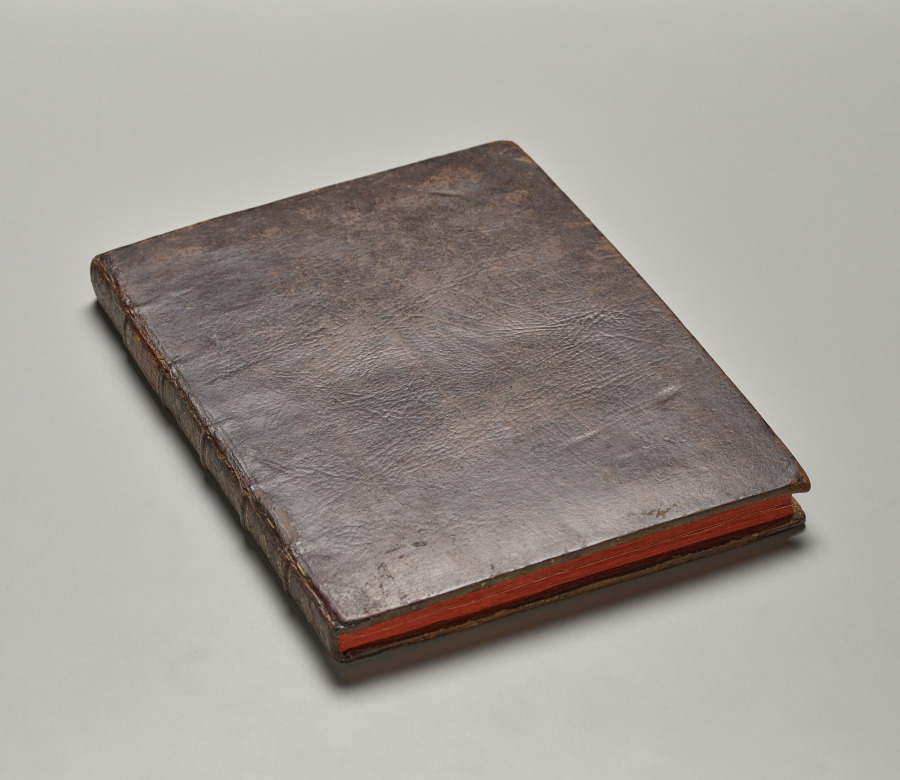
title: The Exercise of Armes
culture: Netherlands, The Hague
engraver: Jacob de Gheyn II (Netherlandish, 1565–1629)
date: 1607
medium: leather bound paper, 117 engraved plates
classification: Bound Volume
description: The Exercise of Armes, published in 1607–8, is one of the most famous manuals of arms. Jacob De Gheyn's book became popular all over Europe and was quickly translated into several languages. Its 117 copper engravings portray the step-by-step sequence for training foot soldiers in the handling of standard weaponry of 17th-century warfare: muskets, matchlock or calivers, and pikes.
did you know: The depiction of the soldiers in this book inspired Rembrandt when painting his famous The Night Watch.